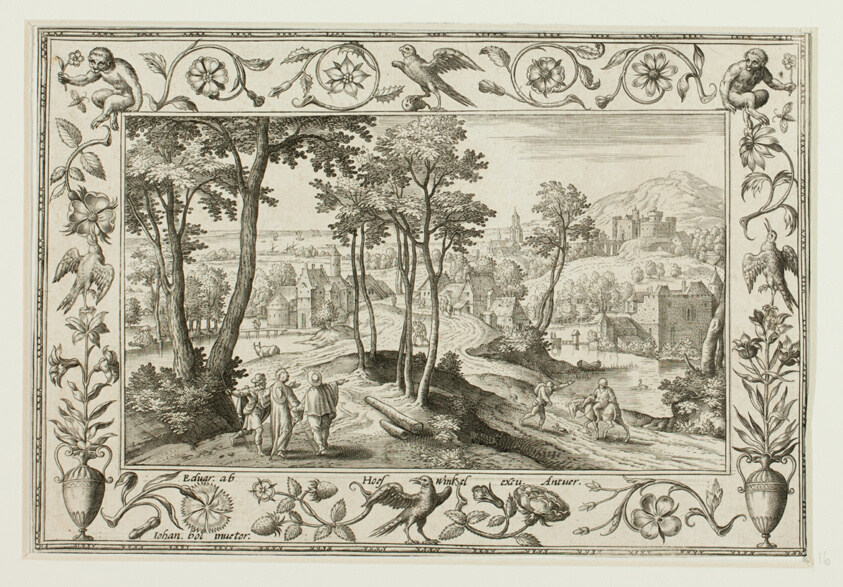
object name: Print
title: The Journey to Emmaus, from Landscapes with Old and New Testament Scenes and Hunting Scenes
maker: Adriaen Collaert (Flemish, c. 1560–1618); after Hans Bol (Flemish, 1535–1593); published by Anna van Hoeswinckel (Flemish)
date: 1584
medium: Engraving in black on cream laid paper, laid down on cream laid paper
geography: Flanders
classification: engraving; paper; print; prints and drawing